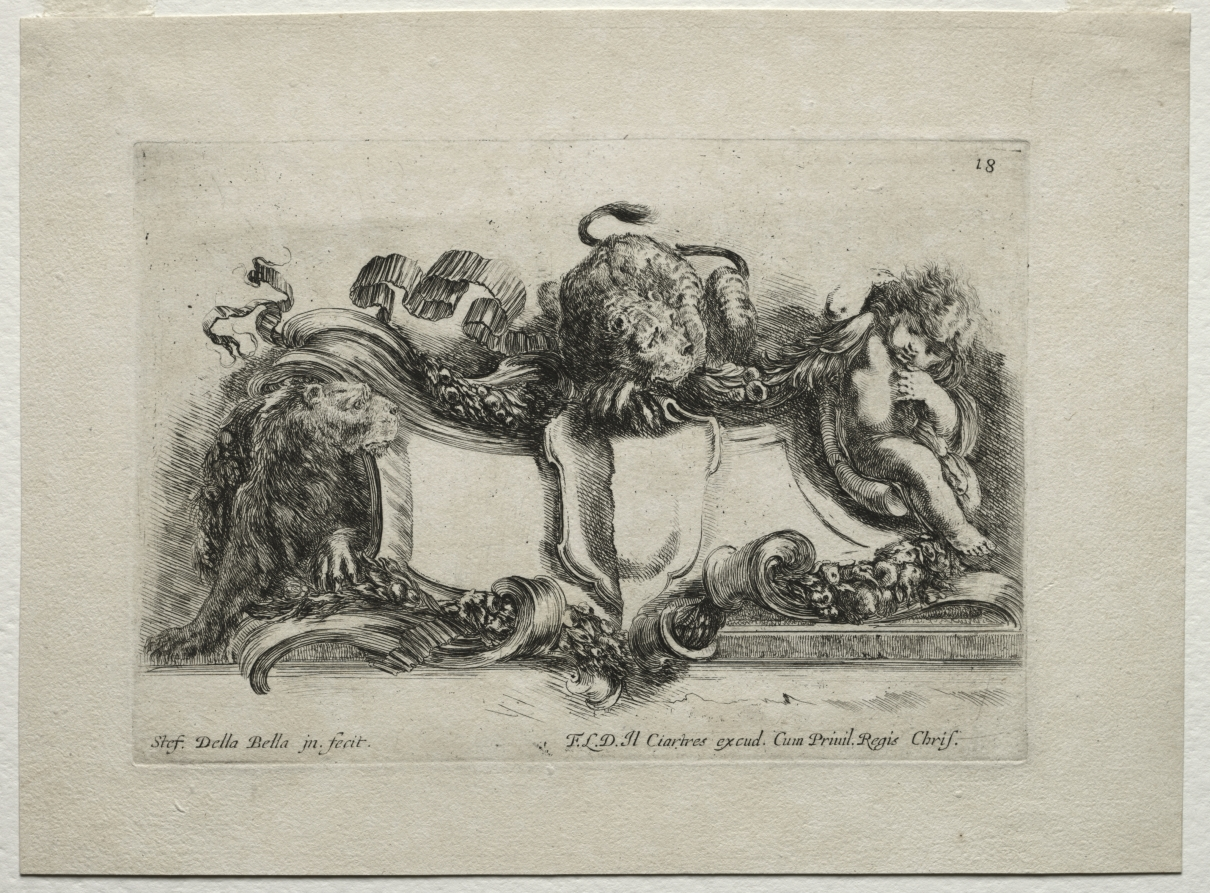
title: Collection of Various Caprices and New Designs of Cartouches and Ornaments: No 18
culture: Italy, 17th century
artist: Stefano Della Bella (Italian, 1610–1664)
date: 1646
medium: etching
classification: Print